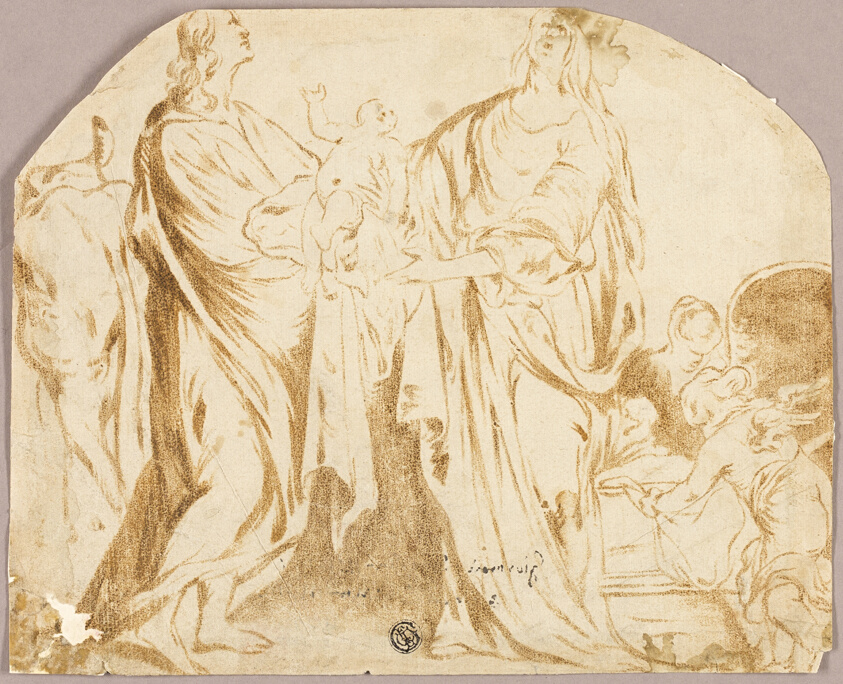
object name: Drawing and Watercolor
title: Presentation in the Temple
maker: Circle of Antonie van Dyck (Flemish, 1599-1641); or Giovanni Segala (Italian, 1663-1720)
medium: Oil on cream laid paper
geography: Flanders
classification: drawings (visual works); prints and drawing